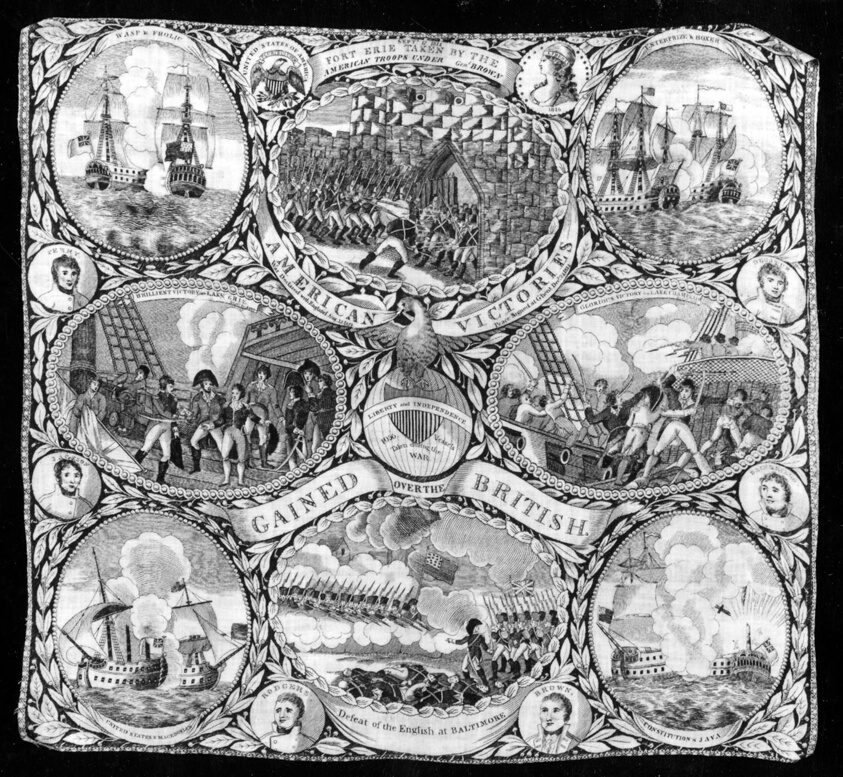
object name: Textile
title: Handkerchief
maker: Probably United States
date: c. 1816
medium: Cotton, plain weave; engraved roller printed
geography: United States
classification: textile; weaving - printed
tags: propaganda